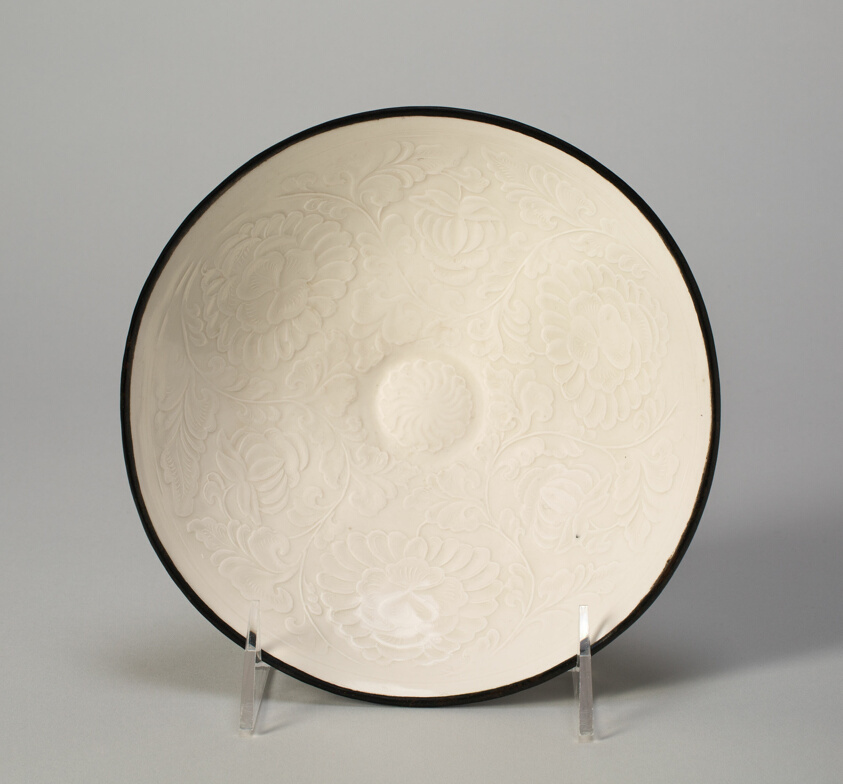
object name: Vessel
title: Dish with Crane amid Floral Scrolls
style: Chinese (culture or style)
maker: China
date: Jin dynasty (1115–1234), 12th century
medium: Ding ware; porcelain with underglaze mold-impressed decoration; metal rim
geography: China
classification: dish (vessel); porcelain; asian art; ceramics; vessel